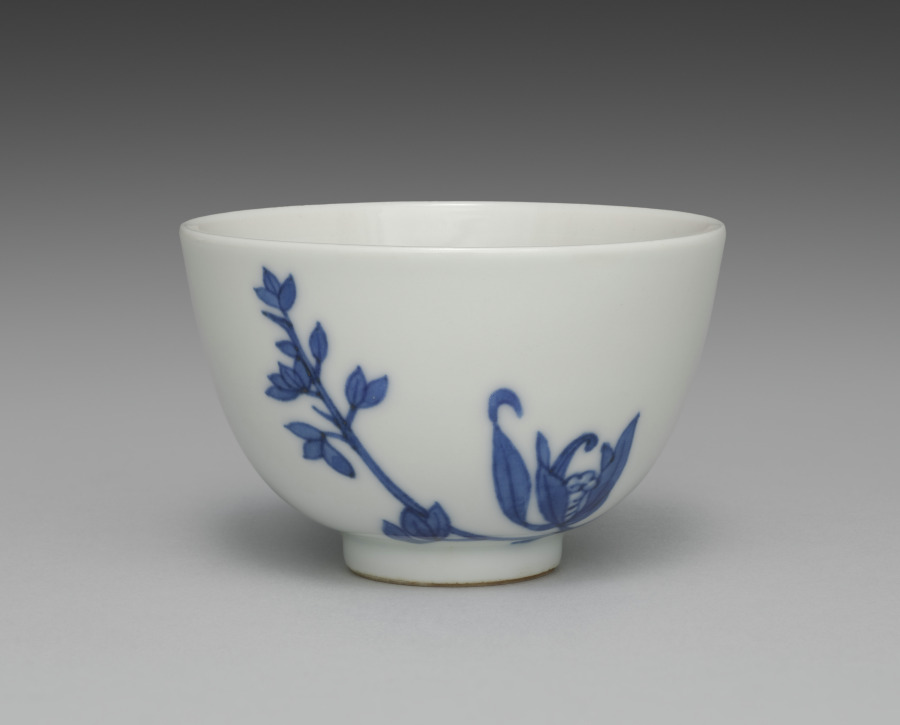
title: Teacup from Tea Set with Orchids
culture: Japan, Meiji period (1868–1912)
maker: Seifū Yohei III (Japanese, 1851–1914)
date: c. 1893–1914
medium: Porcelain with underglaze blue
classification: Ceramic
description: Although the teapot here is stored in a separate box from the five cups, these six pieces may once have been part of a tea set that included other tools such as a water cooler. The teacups have orchid flowers on both sides in underglaze blue, as well as a blue band inside the footring. The teapot has the same design and a blue band painted around the bottom of the lid’s knob. The cups’ long wood storage box is stamped on the exterior, over the lid and base, with a small red seal reading “Satō.” The same seal appears on five small squares of yellow textile, one placed in the bottom of each compartment in the teacup storage box. These are additional to the customary yellow cloths stamped with a “Seifu” seal. Interestingly, four of the Seifū cloths are stamped with an ovoid seal, while the remaining cloth, which is a slightly lighter color, has an unusual seal that is not quite gourd-shaped and with the fū of Seifū in a stylized, unrecognizable form. The teapot has its own box with a Satō seal and is wrapped with an orange textile stamped with the same unusual Seifū seal. A set with a very similar surface design is in the Brooklyn Museum. The Brooklyn set has a water cooler and a small pitcher, in addition to the teapot and cups, and all are in a single storage box. This box records the tea tools as made with kanpakuji, or “bright-jewel white porcelain,” counted among Yohei III’s most important inventions, and carved images. In fact, both sets have a white surface much closer in coloration to the cool white of porcelain clay used in Kyoto at the time, and the designs are simply painted. The Brooklyn set was thus likely mismatched at some point with a box intended for another tea set. Nonetheless, the box may have helped prevent the set’s original components from being dispersed, and the set itself provides insight into how the other tools from the present set may have looked.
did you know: This tea set with orchids has a side-handled pot called a kyūsu, used for steeping, straining, and serving tea.